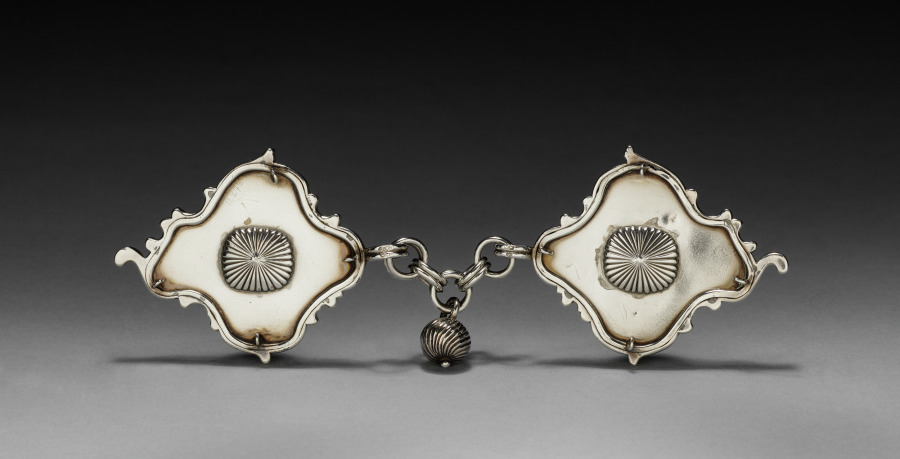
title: Cloak Clasp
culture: Russian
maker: House of Fabergé (Russian, 1842–1918)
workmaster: Henrik Wigström (Russian, 1862–1923)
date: c.1903–8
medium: aquamarine, half pearl bezel, oyster guilloché enamel, silver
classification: Jewelry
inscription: Inscribed with the Cyrillic initials “HW”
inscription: “88” silver standard